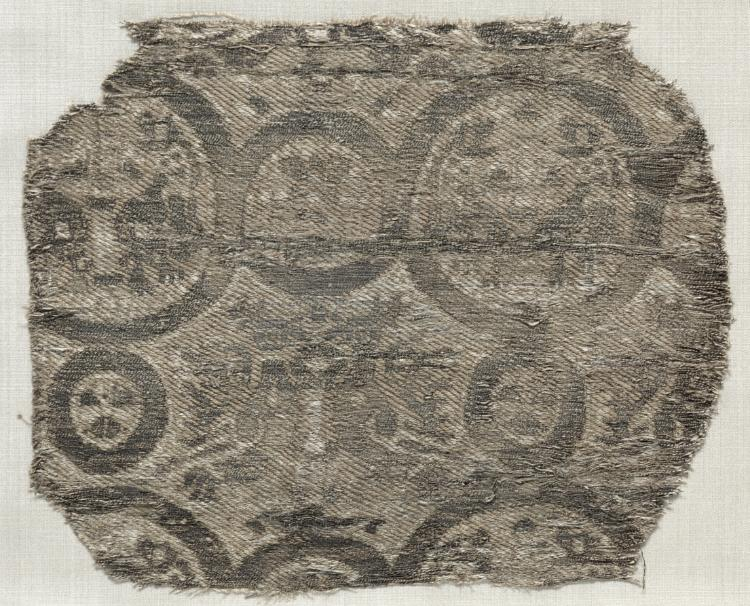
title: Silk Fragment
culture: Italy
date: 1200s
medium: silk and gold thread: compound twill weave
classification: Textile